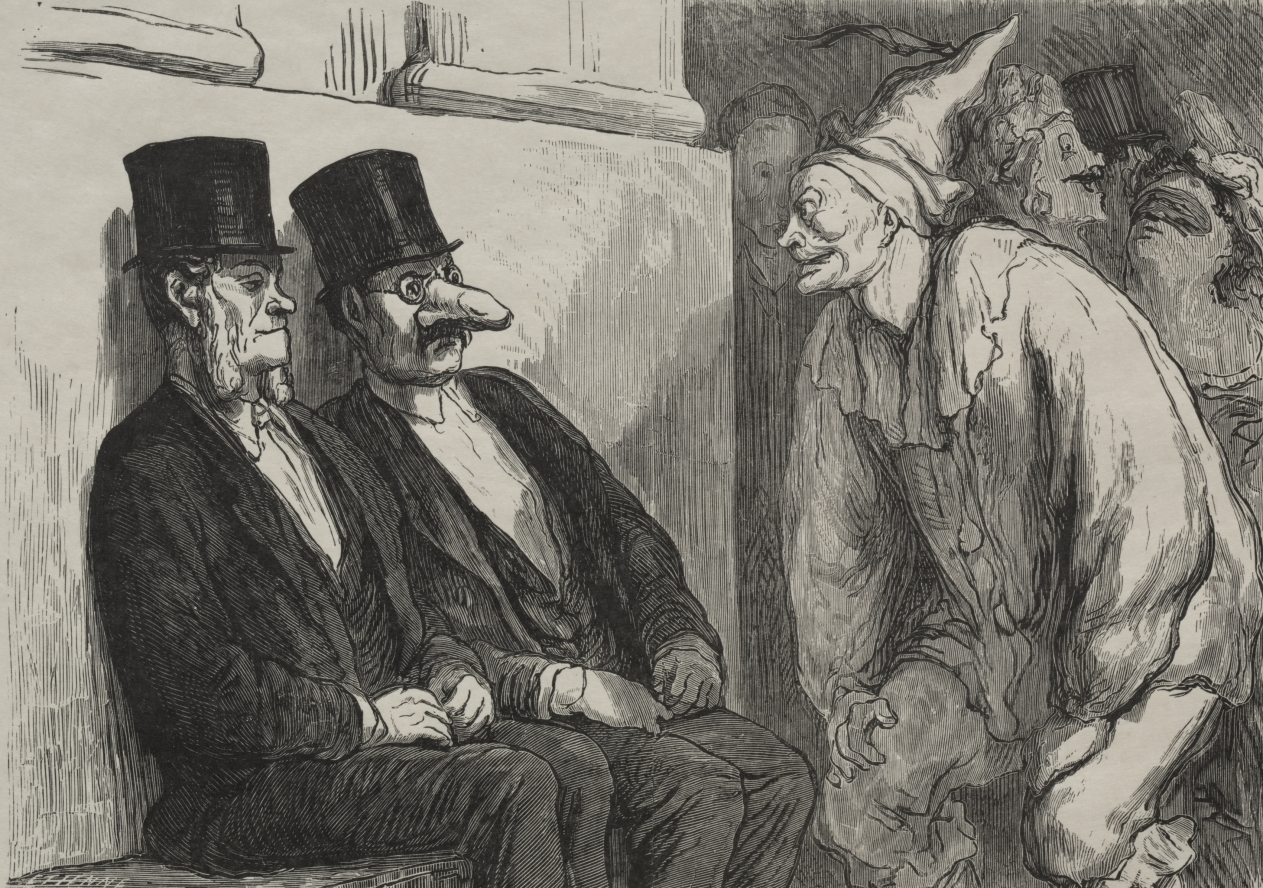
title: At the Opera Ball: You are having too much fun!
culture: France, 19th century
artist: Honoré Daumier (French, 1808–1879)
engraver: Étienne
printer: François Louis Schmied (Swiss, 1873–1941)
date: 1868, printed 1920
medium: wood engraving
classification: Print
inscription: Lower margin, in pencil: 65/75 ; red stamp: FLS